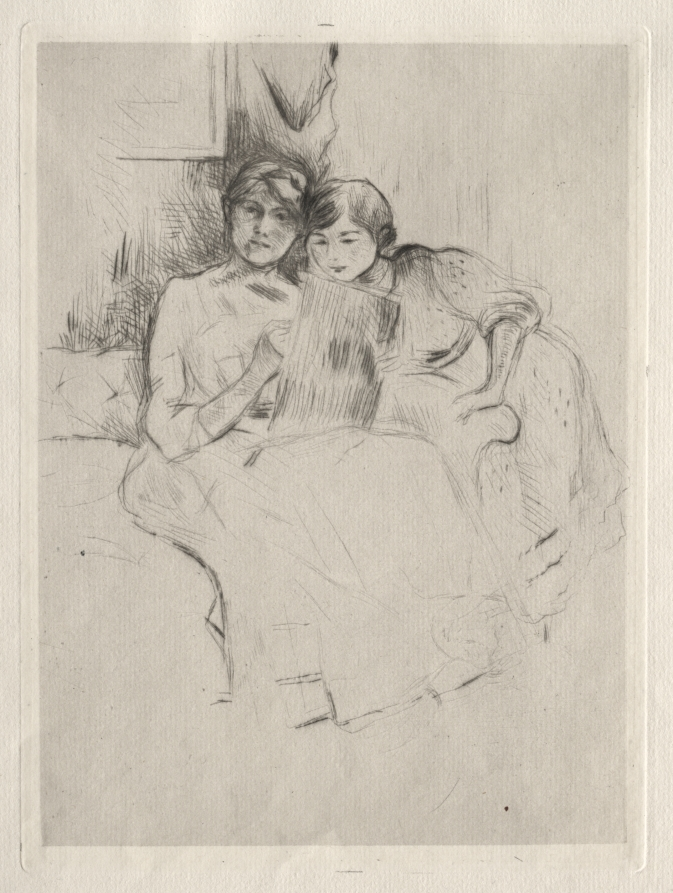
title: The Drawing Lesson (Berthe Morisot Drawing with Her Daughter)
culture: France, 19th century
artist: Berthe Morisot (French, 1841–1895)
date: 1889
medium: drypoint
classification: Print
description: Encouraged by the Impressionist Mary Cassatt and the poet Stéphane Mallarmé, Morisot experimented with printmaking between 1887 and 1889. In this drypoint, a technique in which a sharp tool is used to scratch lines onto a copper plate, Morisot looks directly at the viewer—as if drawing our portrait—while 11-year-old Julie observes her mother at work.